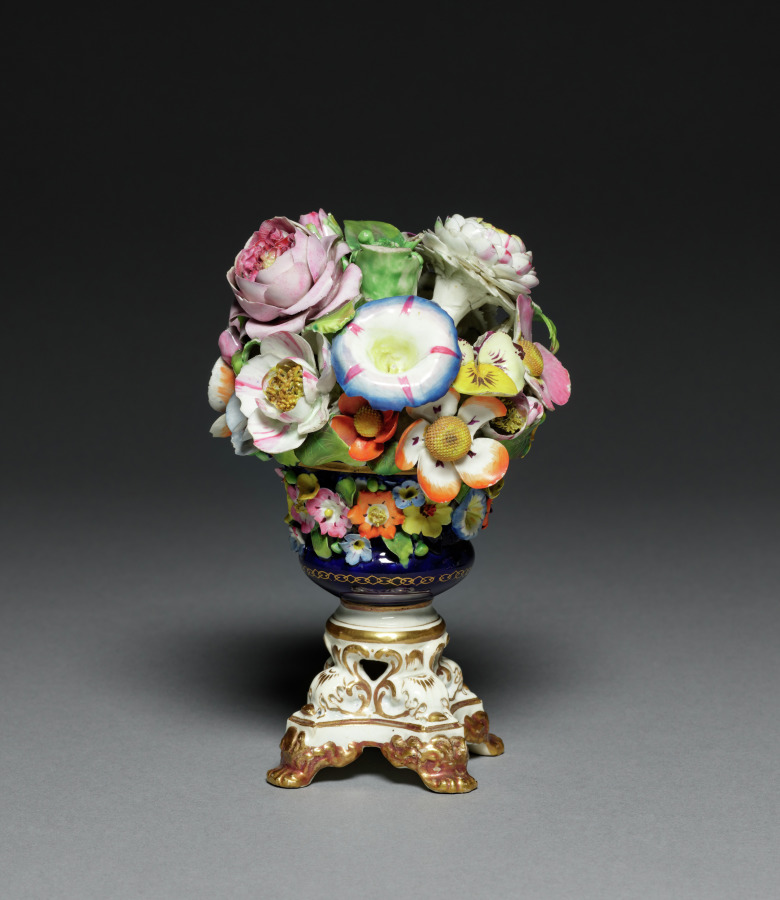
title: Flower Pot and Flowers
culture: England, Derby, 19th century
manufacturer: Derby Porcelain Factory (Bloor Period) (British)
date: 1811–1848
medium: artificial porcelain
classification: Ceramic